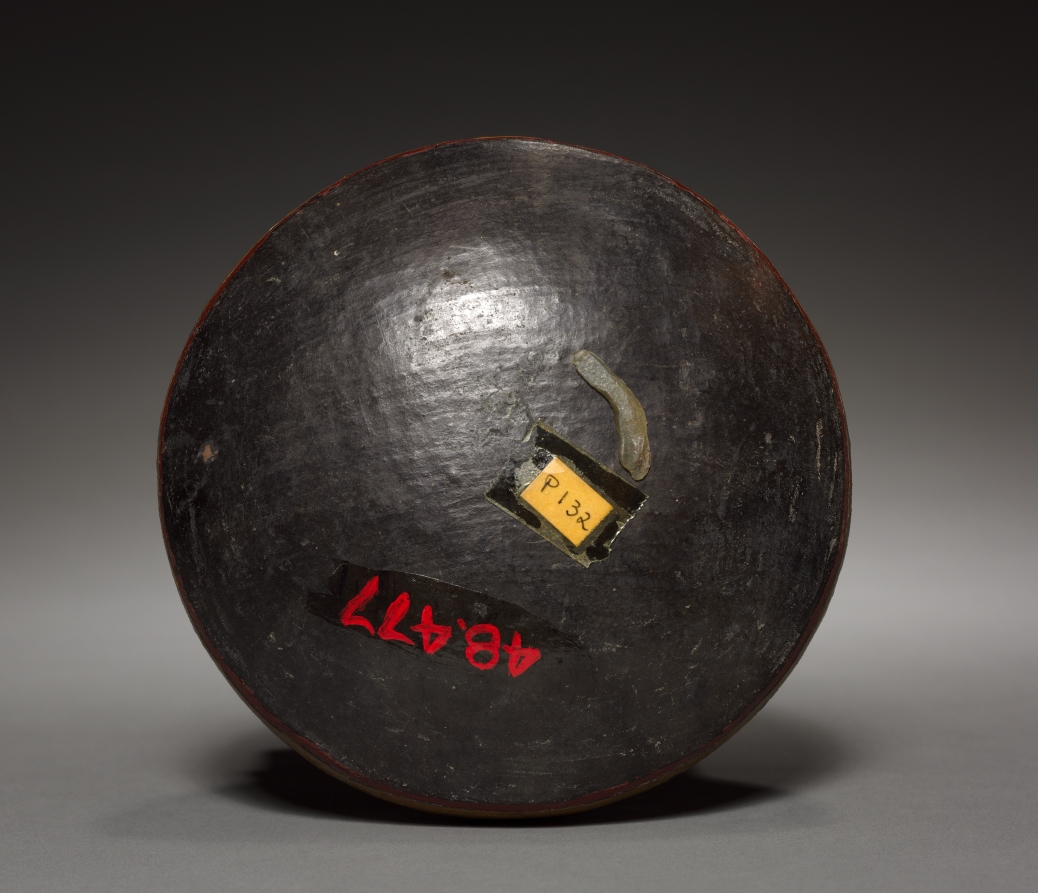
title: Vessel with Feline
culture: Peru, South Coast, Paracas (Cavernas) style (700 BCE–1 CE)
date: 700 BCE–1 CE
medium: earthenware, resin-based paint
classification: Ceramic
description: Little is known of the meaning of the beautifully abstracted felines so often incised on Paracas ceramics. The designs achieve much of their complexity through color applied as resin-based paint after the vessel was fired in a smoky atmosphere that blackened its surface. Two spouts joined by a bridge appear on many fine South Coast ceramics. The form probably had meaning, now lost.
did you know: Small, wild, reclusive felines, pampas cats live on the margins of agricultural fields, where they prey on rodents and other pests that are a farmer’s bane